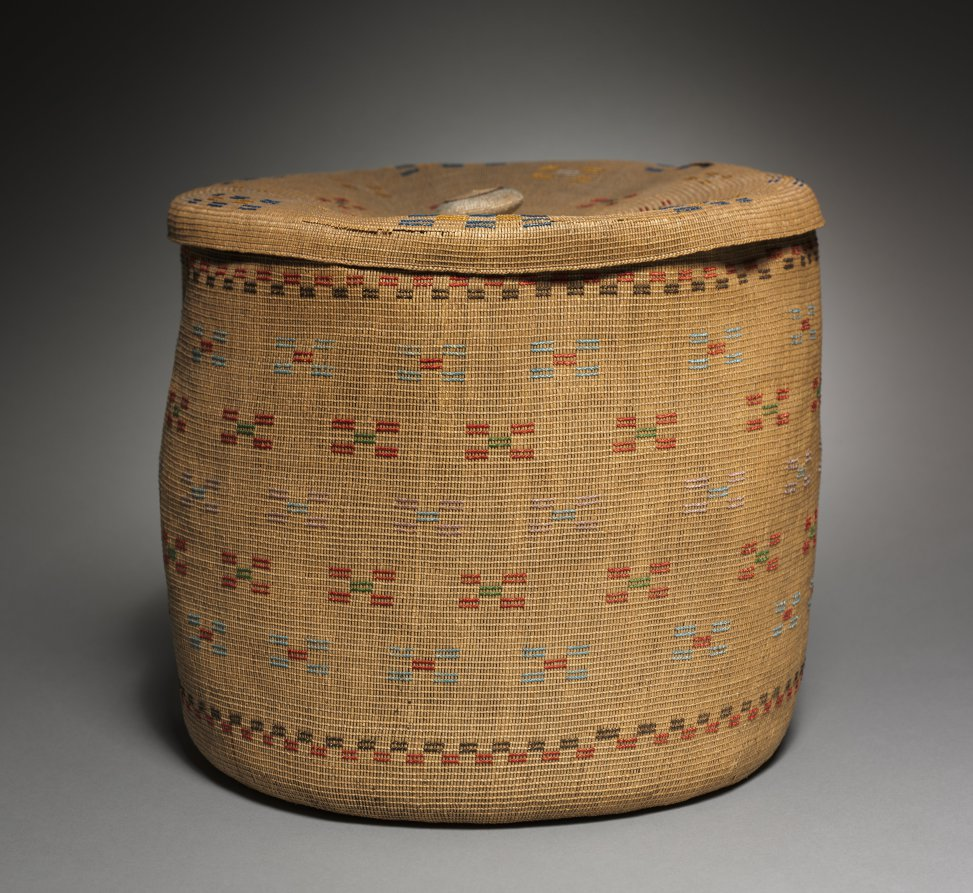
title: Covered Twined Cylindrical Basket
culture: Arctic. Aleut (Attu), late 19th-early 20th century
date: late 1800s–early 1900s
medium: twined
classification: Basketry